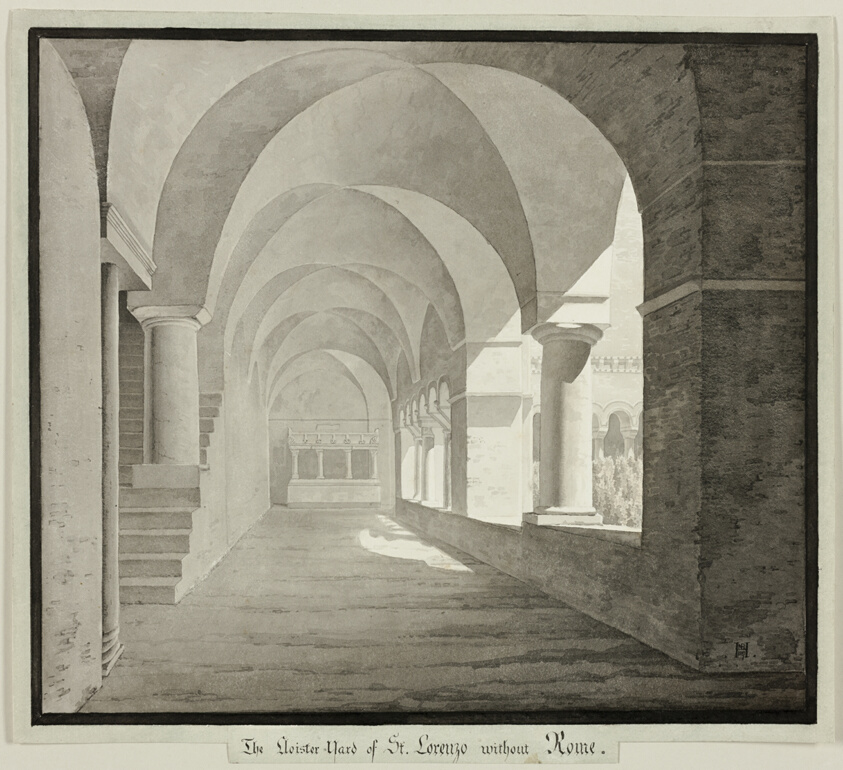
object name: Drawing and Watercolor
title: The Cloister of San Lorenzo Fuori le Mura, Rome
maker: Unknown Artist; German or Scandinavian, 19th century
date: 1827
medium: Brush and various gray washes over traces of graphite, on ivory wove paper, laid down on cream wove paper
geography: Germany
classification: drawings (visual works); prints and drawing